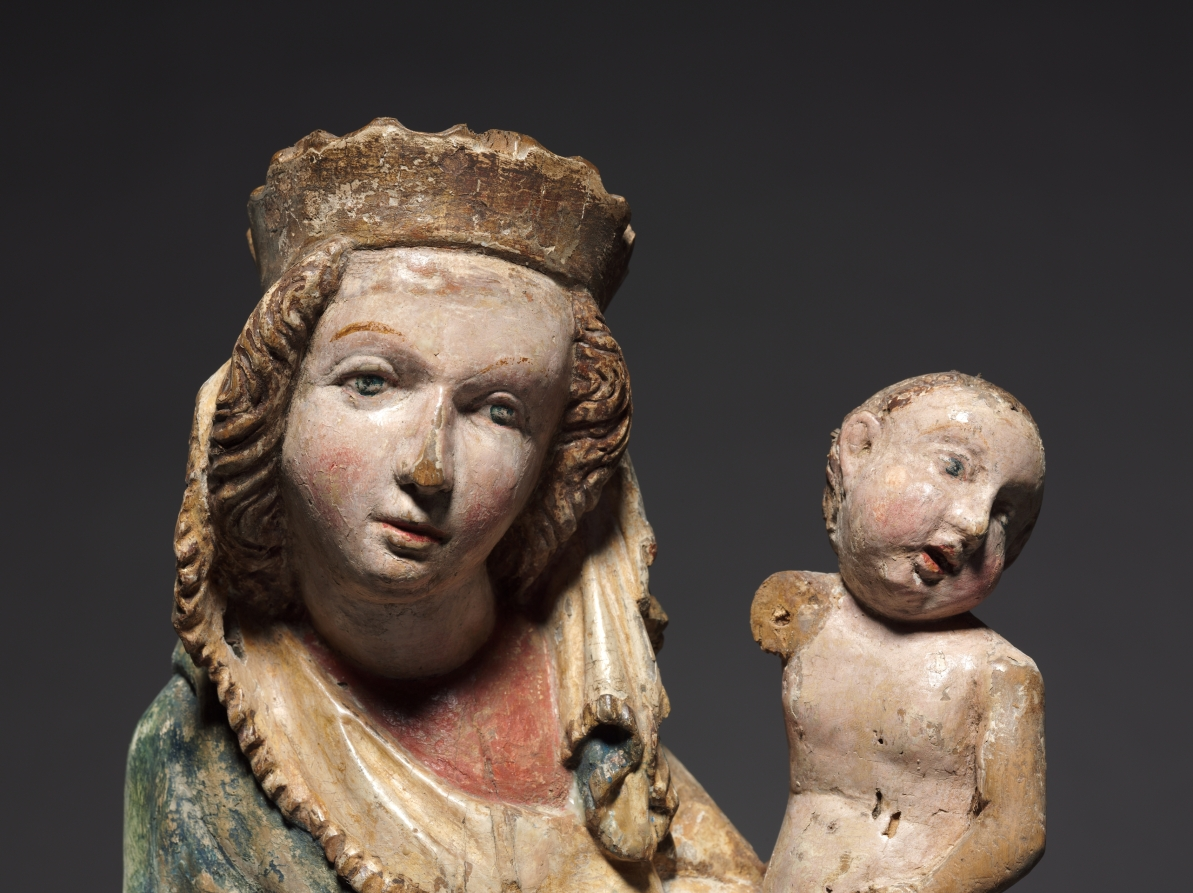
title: Madonna and Child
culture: Bohemia, vicinity of Freistadt, 15th century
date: c. 1400–1410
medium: lindenwood with polychromy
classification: Sculpture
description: This sculpture belongs to a type known as a Schöne Madonna or "Beautiful Virgin," popularized in central Europe during the late 1300s and early 1400s. The Virgin’s stance adheres to an S-curve as she stands with one leg straight and the other slightly bent at the knee. Her body is hidden beneath long, voluminous, draping garments. These so-called Beautiful Madonnas are among the most popular creations of Bohemian art and were in high demand for churches and private veneration.